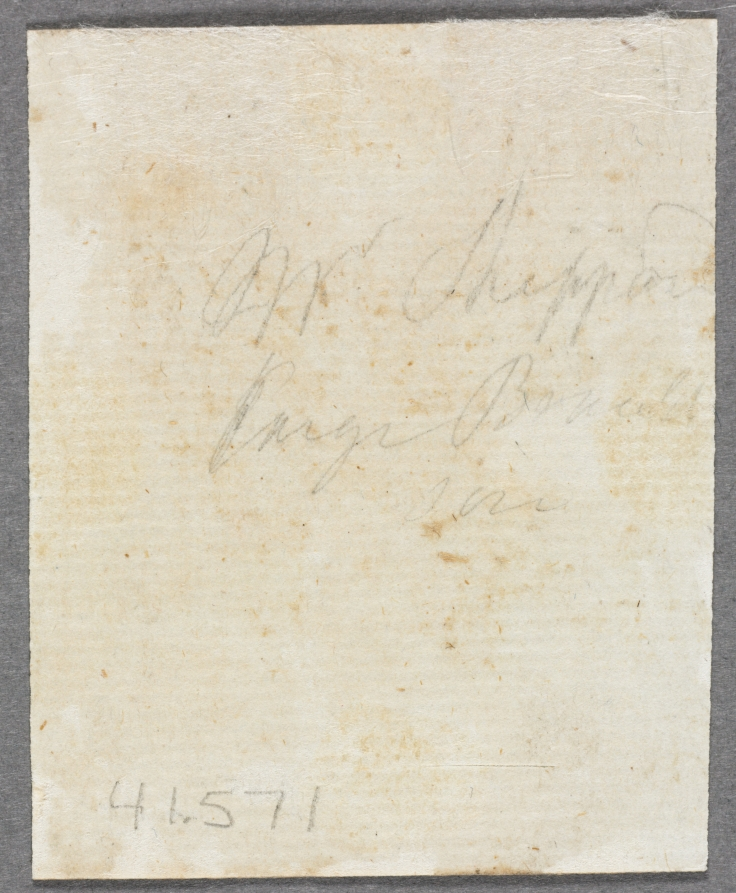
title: Portrait of Mr. Shippard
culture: England, 18th century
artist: John I Smart (British, 1741–1811)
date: c. 1776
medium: graphite and wash on laid paper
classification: Portrait Miniature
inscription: inscribed very faintly in graphite on front at upper right: 161; on back (paper backing to which drawing paper was adhered) inscribed in graphite, at top upside down: 161; also on paper backing in graphite, on a slant at lower left: Mr. Jones; inscribed on back of drawing, beneath paper backing, in graphite: Mr Shippar[d] large Bracelet size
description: Although it is impossible to say whether or not it was always part of the artist’s process to execute a preparatory sketch prior to painting each miniature, we do know that John Smart retained many hundreds of these sketches. A group of preparatory sketches—of which this portrait is one—descended through the Smirke family after Smart’s daughter Sarah gave a sketchbook containing preparatory portrait studies to her friend Mary Smirke, sister of the celebrated Victorian architect Sydney Smirke. This book was probably broken up around 1877 when its contents was divided between Sydney’s daughters Mary Jemmett and Mrs. Lange, whose portions were both sold at auction in 1928. G. C. Williamson was the first to suggest that Smart’s sketches were well known and that they were preparatory studies for the painted miniatures. Williamson listed the names of sitters from the sketches known to him at the time, and they include a Mr. Jones, the title formerly given to the sketch here. This designation was applied only to a paper backing that had been attached after the drawing had been removed from the sketchbook. There is no further evidence for this attribution, however. The sketch is of the sitter’s head only, with a slight suggestion of a high stock collar. His head faces to the left, and his light hair is combed straight back with a flat curl above his right ear. He is depicted in an oval, and the background is unpainted. The number 161 is inscribed in graphite on both the front of the drawing and its paper backing. Upon removal of the paper backing in 1993, an inscription in graphite was revealed. Perhaps written in the artist’s hand, it suggests that the sitter’s name may be Mr. Shippar[d]. There are no known portraits of this gentleman. The work can be dated to about 1776 because of its size, which, when painted on ivory, would have been around 2 inches in height. An inscription on the back of the drawing suggests that the miniature was to be mounted on a bracelet. To this date, the finished ivory for which this preparatory sketch was presumably undertaken has not been discovered.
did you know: Sketches helped John Smart work out the particulars of a portrait before commencing the miniature on ivory, and they were useful in the event that a duplicate might later be required.